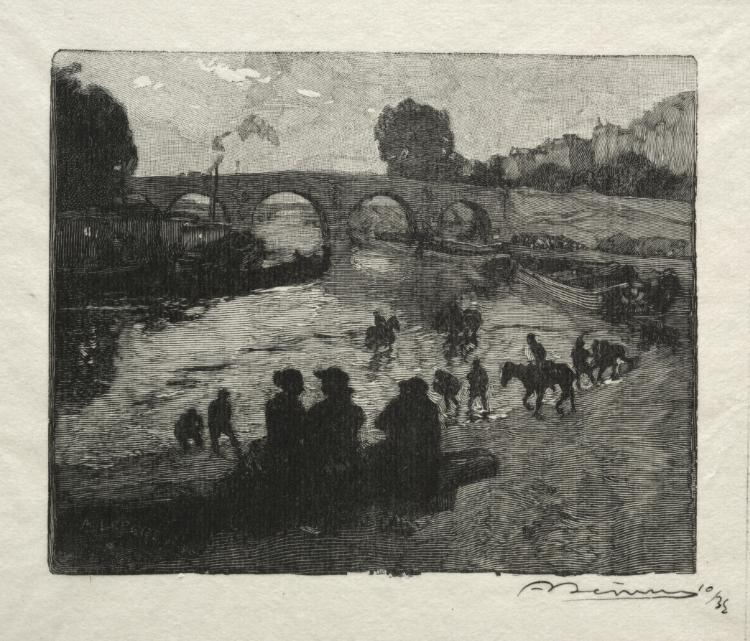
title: L'Abreuvoir du Pont Marie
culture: France, 19th-20th century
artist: Auguste Louis Lepère (French, 1849–1918)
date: 1890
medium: wood engraving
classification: Print